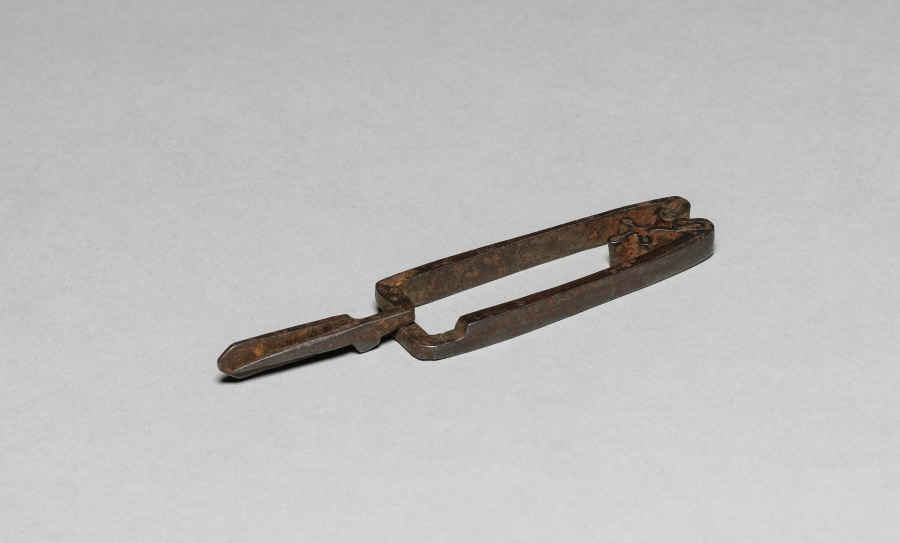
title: Tweezers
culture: Europe, 17th century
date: 1600s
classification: Tool